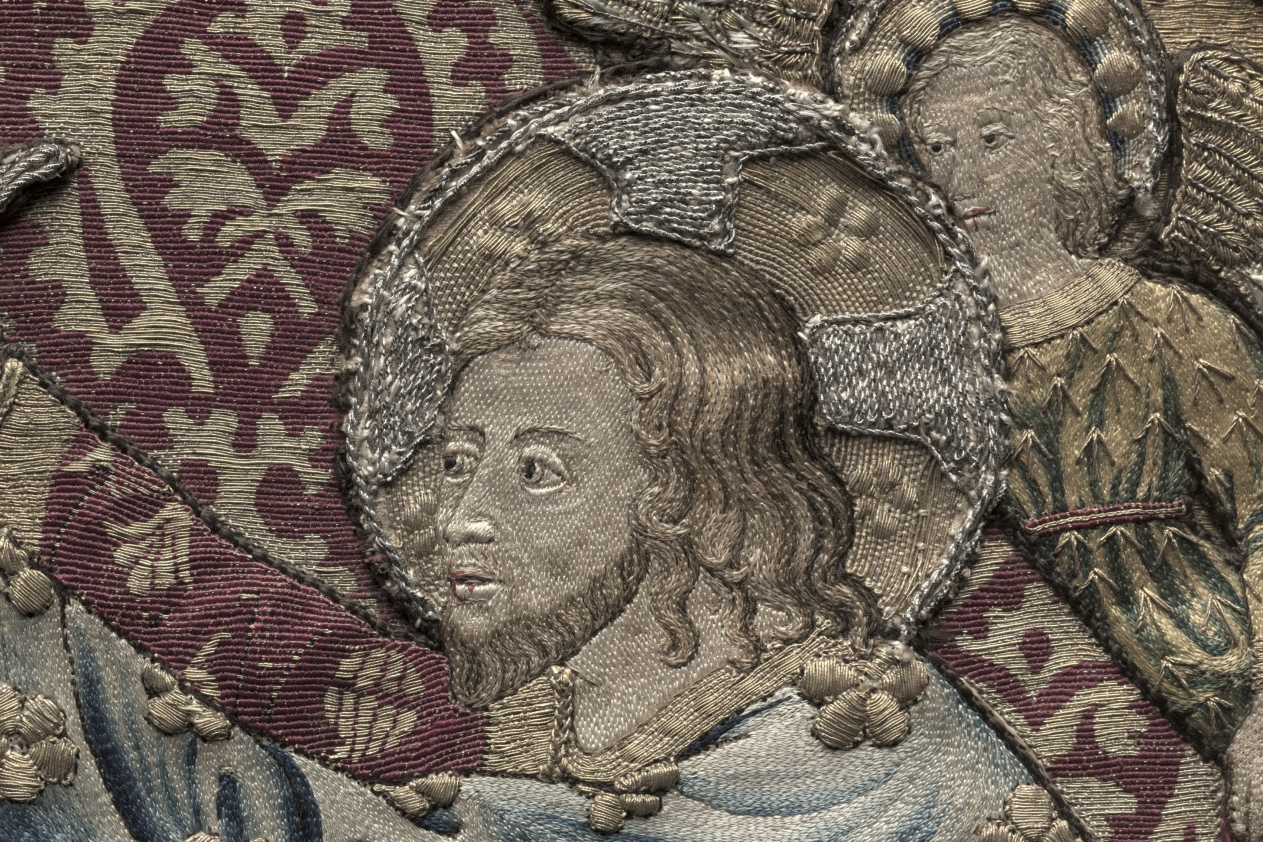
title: Embroidered Tondo from an Altar Frontal: The Coronation of the Virgin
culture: Italy, Florence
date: 1459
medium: Embroidery with gold, silver, and silk thread; split, satin, and couching stitches, or nué (shaded gold)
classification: Embroidery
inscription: the embroidery is backed by an old reused parchment with Latin writing over which in Italian is penned an inscription: "This pallioto was embroidered in the year 1486 by the venerable Margherita del Caccia nun of this monastery. . ." [It is difficult to know to what extent one should rely on this inscription as the style and technique both point clearly to an earlier date.]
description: This masterpiece of Florentine embroidery takes the circular form called a tondo and was likely once attached to an altar frontal. The scene depicts the coronation of the Virgin, the final and culminating event in the narrative cycle of her life. Honoring her as queen of heaven, Christ places the crown on his mother’s head. They are surrounded by eight angels as well as Saints Verdiana and John Gualberto, both much esteemed in Florence, creating a joyous scene. During the Renaissance, Florence emerged as an important center for a specific type of embroidery known as or nué, or shaded gold. This stunning technique used metal and silk threads, as seen here, to create pictures that rivaled paintings. It was frequently used for vestments and altar frontals.